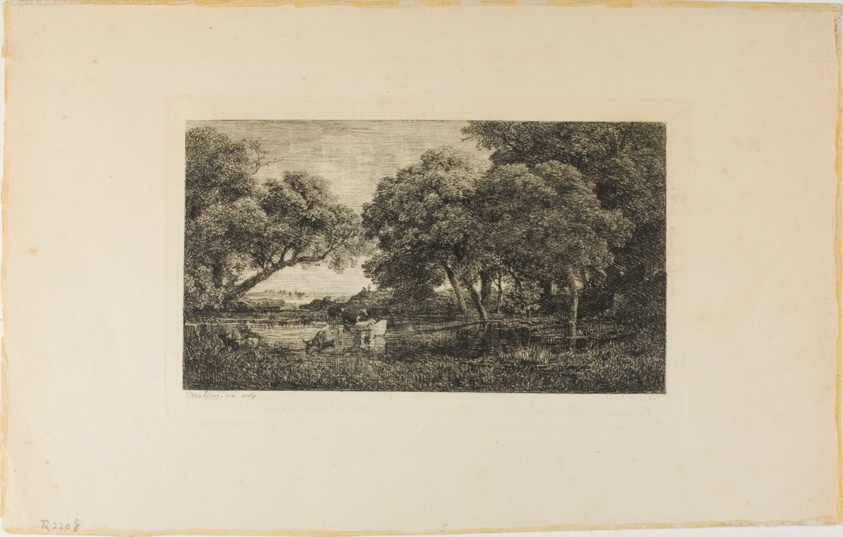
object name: Print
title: Cattle by a Pool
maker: Charles François Daubigny (French, 1817-1878)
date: c. 1850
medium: Etching on cream wove paper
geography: France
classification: etching; print; prints and drawing